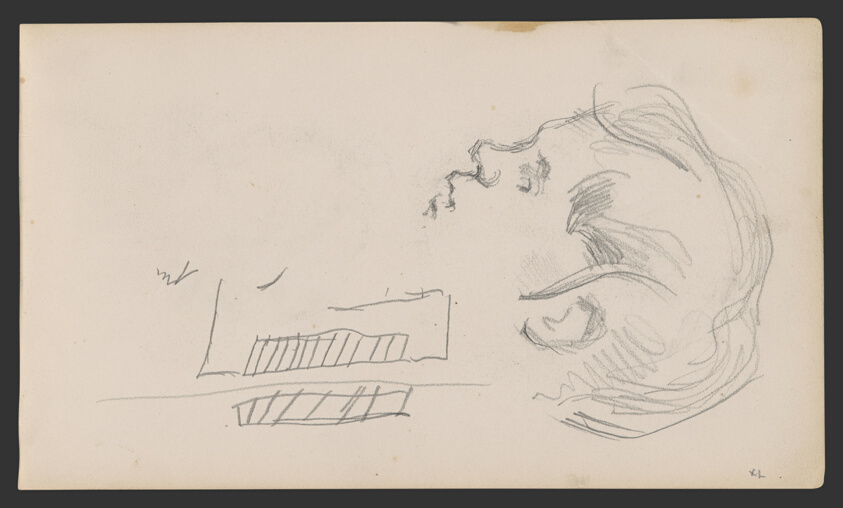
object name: Drawing and Watercolor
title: Sketchbook No. 2 (L'Estaque)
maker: Paul Cézanne; French, 1839-1906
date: 1875–86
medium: Graphite and pen and ink drawings on paper, bound into a book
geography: France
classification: sketchbook; graphite; prints and drawing; paper